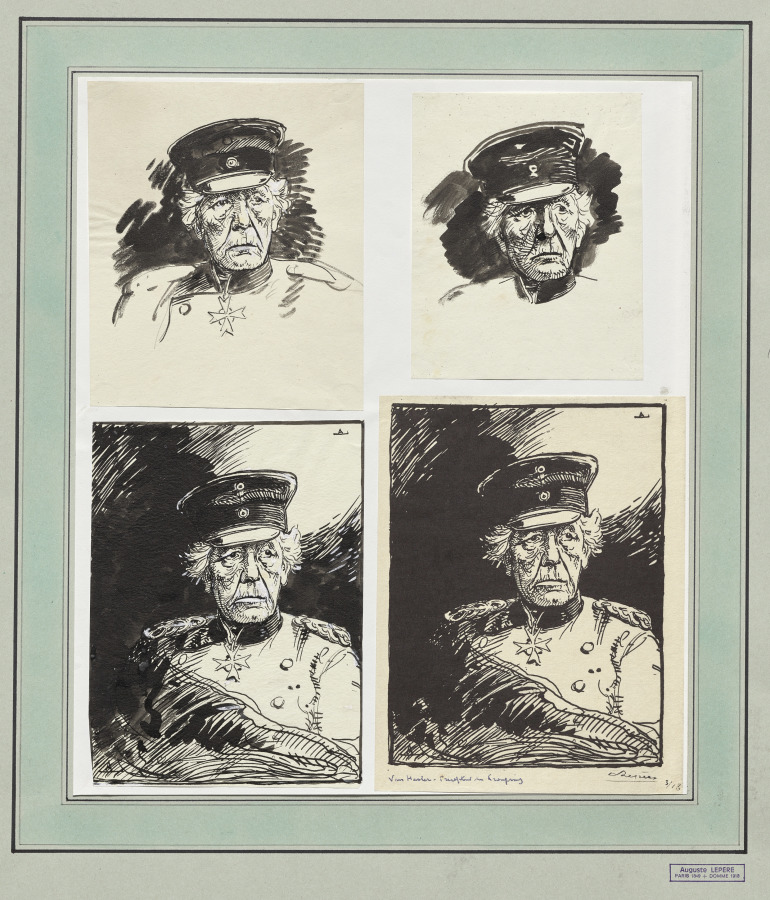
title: Van Hasler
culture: France, 20th century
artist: Auguste Louis Lepère (French, 1849–1918)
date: 1914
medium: pen and brush and black ink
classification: Drawing